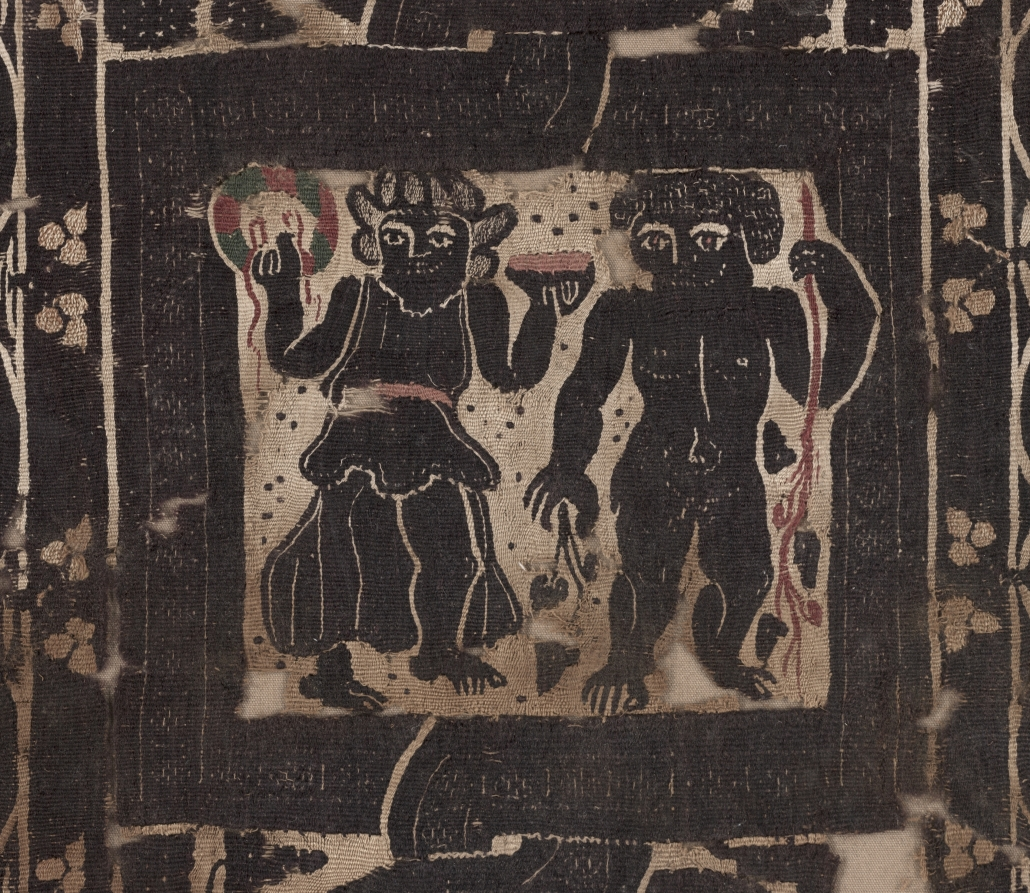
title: Curtain Panel with Scenes of Merrymaking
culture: Egypt, Byzantine period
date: 500s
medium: Linen, undyed; wool: dyed; tapestry weave with supplementary weft wrapping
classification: Textile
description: This large panel conveys merrymaking, wealth, and power through its symbolic imagery and deep purple color. It was originally part of a luxurious wide curtain with similar panels alternating with plain linen panels. Although woven in Christian Egypt, the panel is dominated by pagan subjects. A nude male stands beside a dancing female in transparent clothing in each of the three squares, alternating with centaurs (half-man, half-horse creatures) in roundels. In the central square, Dionysus, the god of wine, holds a grapevine and a weary Hercules leans on his club below. The lively animal imagery conveys wealth because few could afford animals such as lions, bulls, and hares.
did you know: The textile industry drove the Egyptian economy, dominated by the flax plant from which linen is derived.